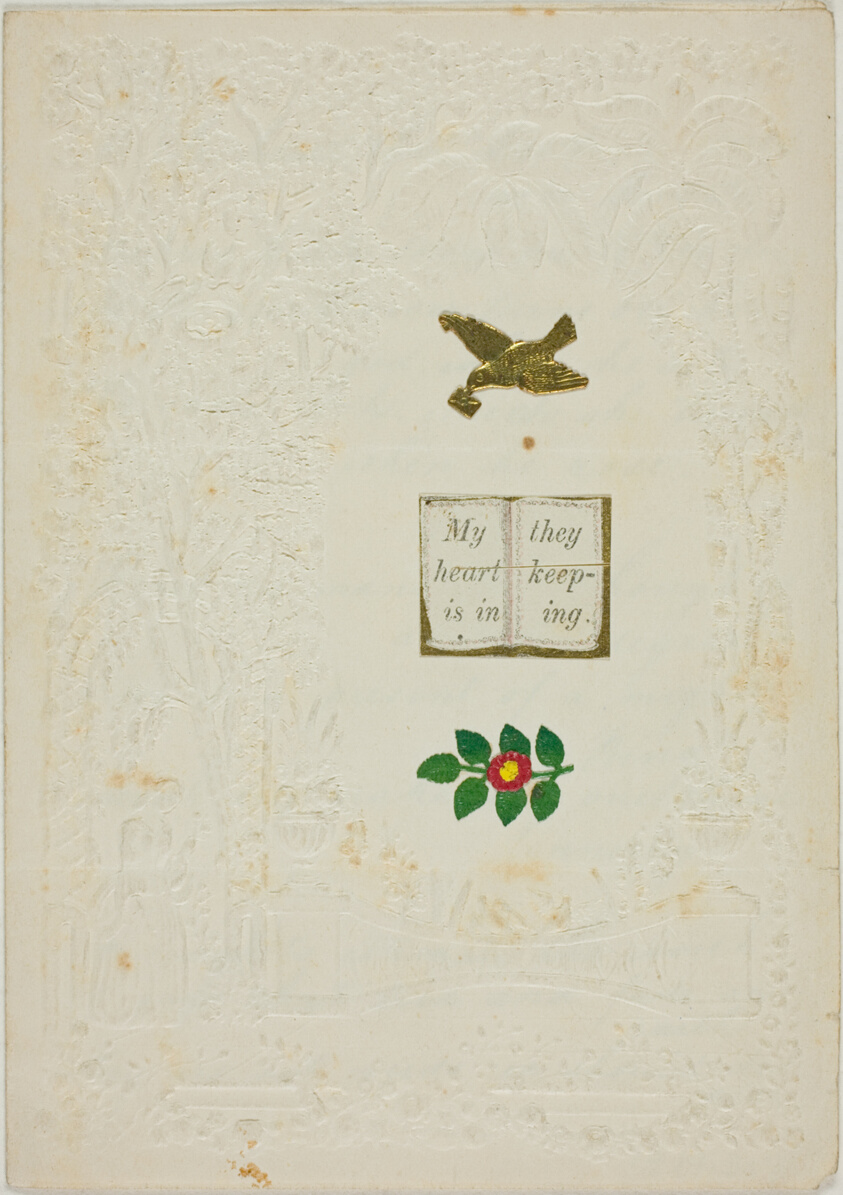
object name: Drawing and Watercolor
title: My Heart is in Thy Keeping (Valentine)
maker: Unknown Artist; English, 19th century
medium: Collaged elements on embossed ivory wove paper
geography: England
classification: valentine; prints and drawing; paper